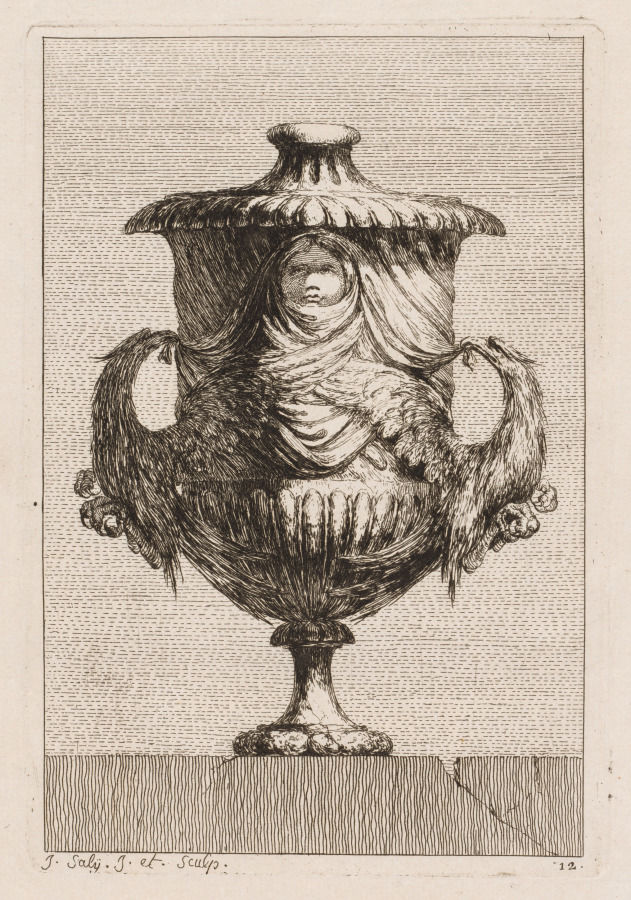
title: Suite of Vases: Plate 12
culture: France, 18th century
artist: Jacques François Saly (French, 1717–1776)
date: 1746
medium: etching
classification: Print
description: Trained as a sculptor, Saly etched a series of 30 vase designs while studying at the Académie de France in Rome. After his return to Paris, the publication announcement for the Suite of Vases endorsed the prints as an indication of the sculptor’s ingenuity and freedom of design. The vase designs also nourished an appetite for the revival of classical elements, or Neoclassicism, in decorative arts that developed in the mid-18th century.